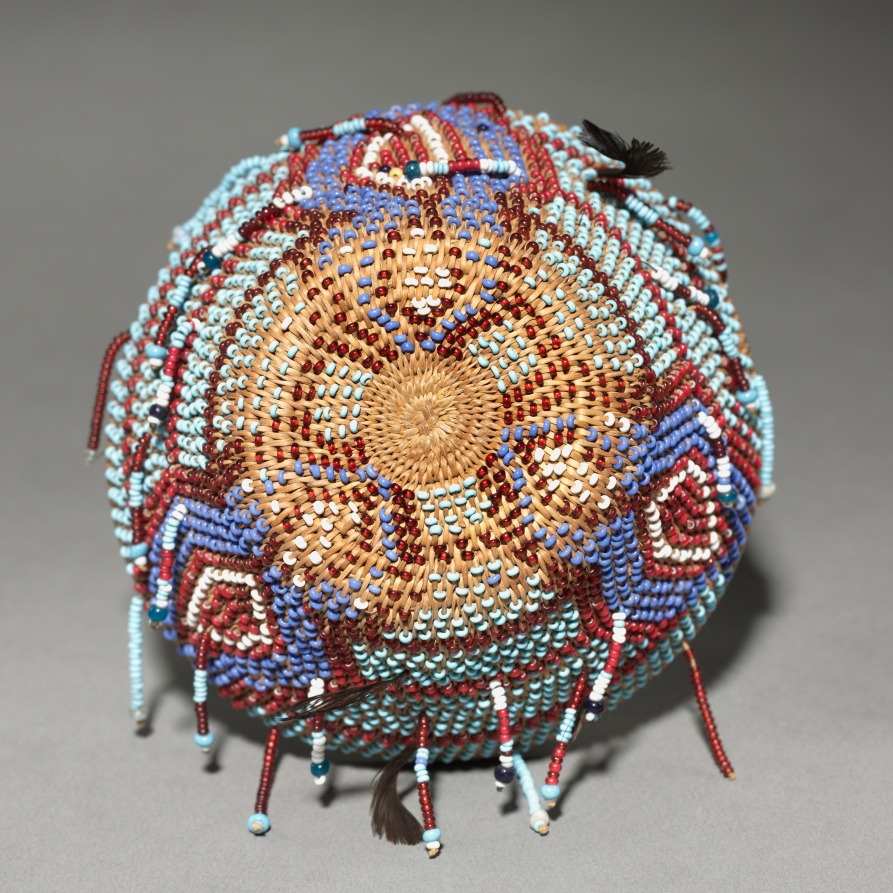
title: Conical Beaded Basket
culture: California, Wappo, Alexander Valley, Late 19th- Early 20th century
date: c. 1875–1925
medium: glass beads and feather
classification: Basketry